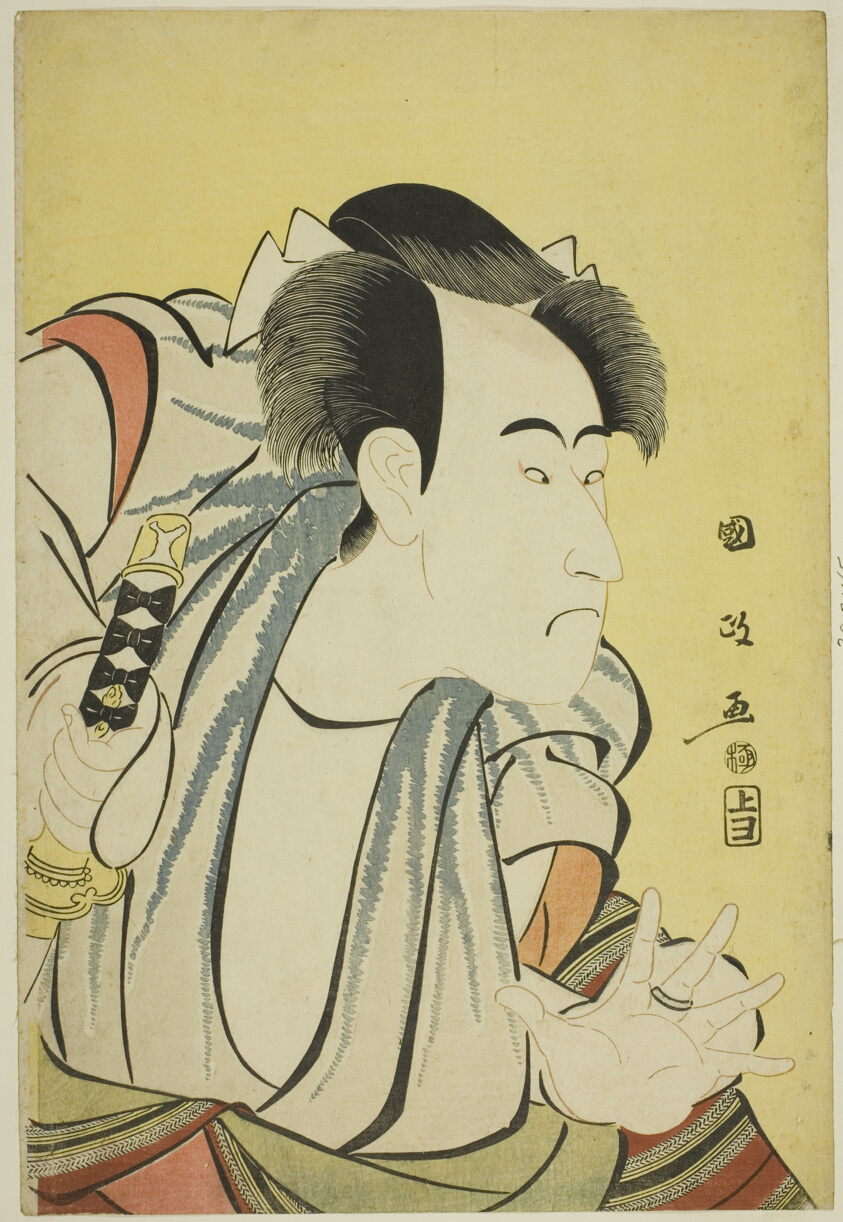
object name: Print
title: Ichikawa Danjuro Vl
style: Japanese (culture or style)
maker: Utagawa Kunimasa; Japanese, 1773-1810; Ichikawa Danjuro IV; Japanese, unknown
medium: Color woodblock print; oban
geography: Japan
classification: woodblock print; print; asian art